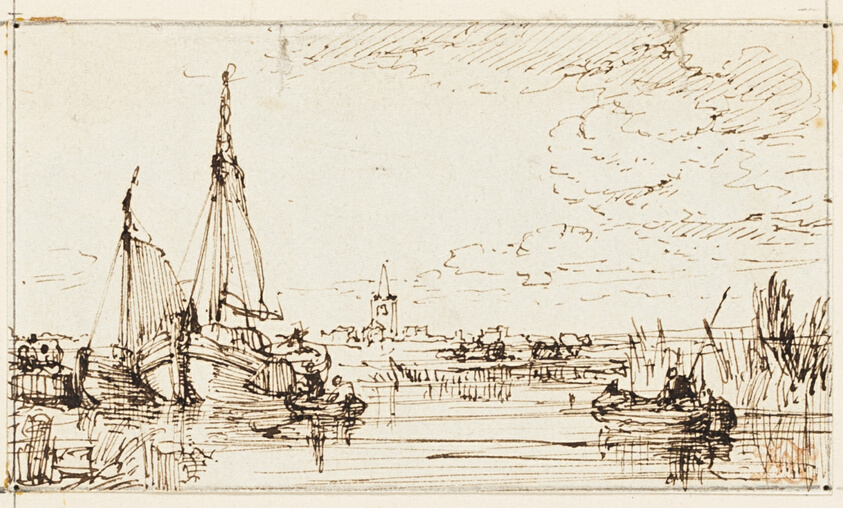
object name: Drawing and Watercolor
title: On the Thames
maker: William Leighton Leitch (Scottish, 1804-1883)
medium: Pen and brown ink on ivory wove paper, laid down on board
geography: Scotland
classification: pen and ink drawings; drawings (visual works); prints and drawing